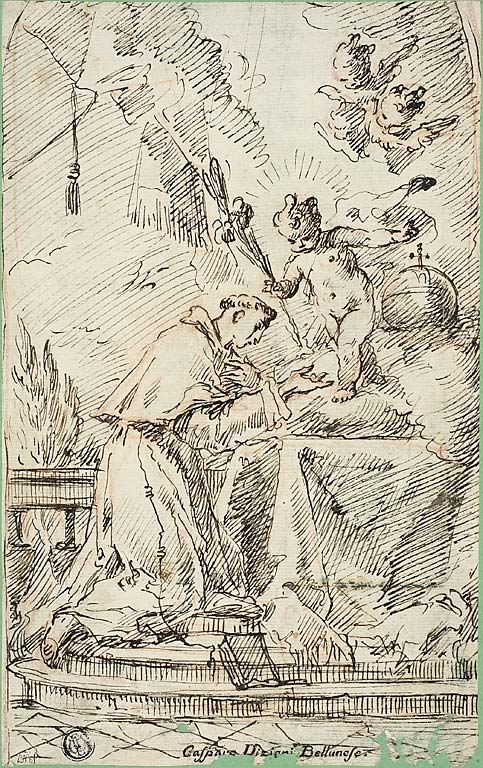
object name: Drawing and Watercolor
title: Saint Anthony of Padua and the Infant Jesus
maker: Gaspare Diziani (Italian, 1689-1767)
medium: Pen and brown ink over red chalk, on ivory laid paper, laid down on green wove paper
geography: Italy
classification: pen and ink drawings; drawings (visual works); prints and drawing